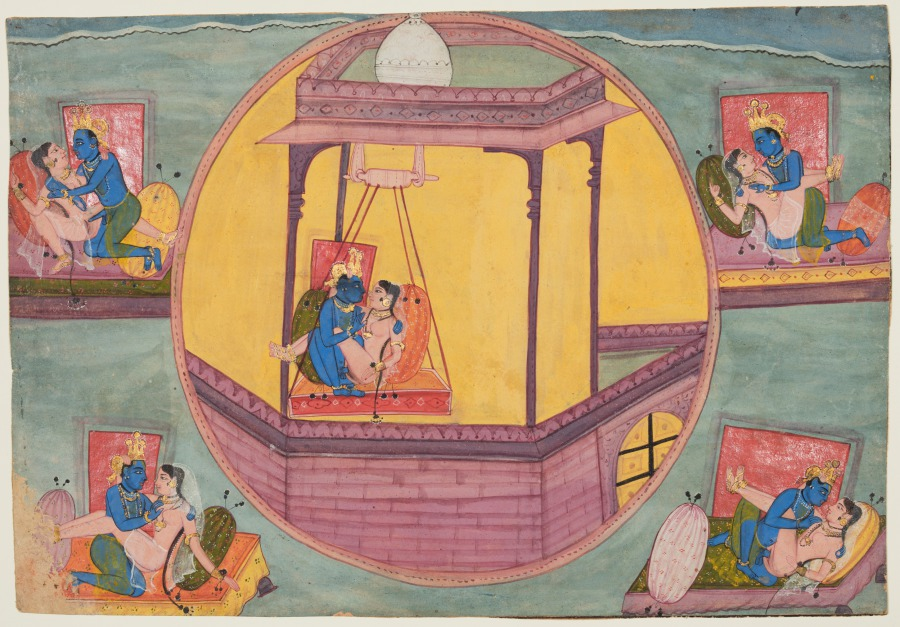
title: Five Poses of Krishna Making Love, from a Bikaner Bhagavata Purana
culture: Northwestern India, Rajasthan, Rajput Kingdom of Bikaner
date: c. 1600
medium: Gum tempera and gold on paper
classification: Painting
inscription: śrī ṭhākurā rī kṛḍā rā a. 131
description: When the Hindu god Vishnu incarnated as his human avatar Krishna, he spent his youth in a cowherd village. When he reached adolescence, the milkmaids were all drawn to him. A passage in the text explains that Krishna miraculously multiplied himself so he could be with each one individually, so they could experience the bliss of divine union.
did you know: Krishna can be seen making love on a swing in the central circle.